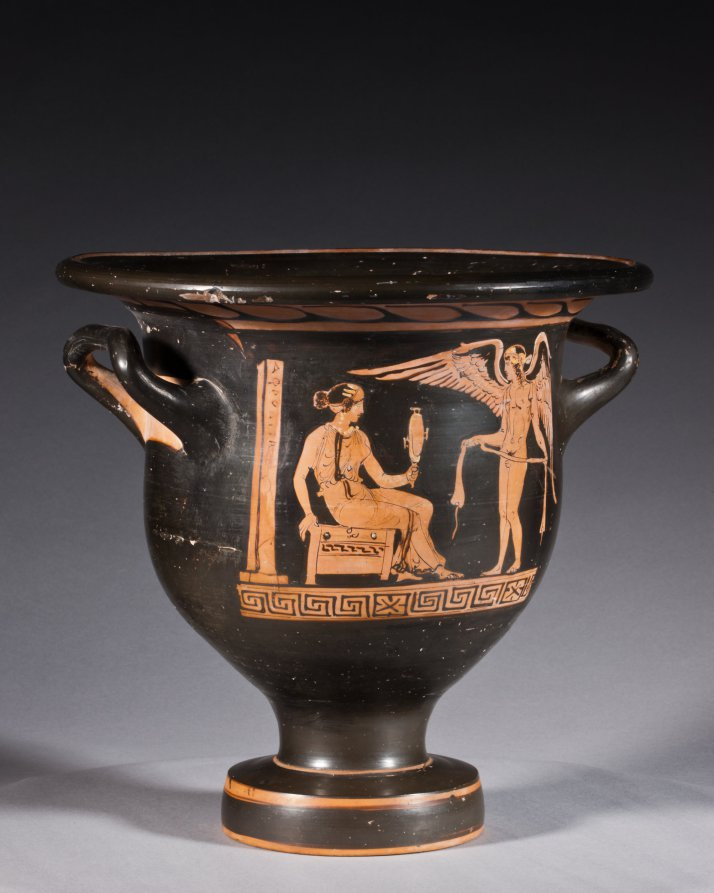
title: Red-Figure Bell Krater (Mixing Vessel): Aphrodite and Eros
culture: South Italian, Apulian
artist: attributed to Graz Painter (South Italian, Apulian, active c. 380–360 BCE)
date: c. 370–360 BCE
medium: ceramic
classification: Ceramic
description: This small mixing vessel shows a finely dressed woman seated on a chest and holding up a mirror to admire herself. Before her stands Eros, the winged god of love, holding a ribbon or sash. Behind the woman stands a pillar with the inscription ΑΦΡΟΔΙΤΗ, or APHRODITE, the goddess of love. Such labels are rare on vases, and scholars debate whether this names the woman shown as Aphrodite herself, with her son Eros, or a bride envisioning herself as Aphrodite, just before her wedding.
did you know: The dancing nude youths on the reverse are unusual; typically they would be standing and draped.